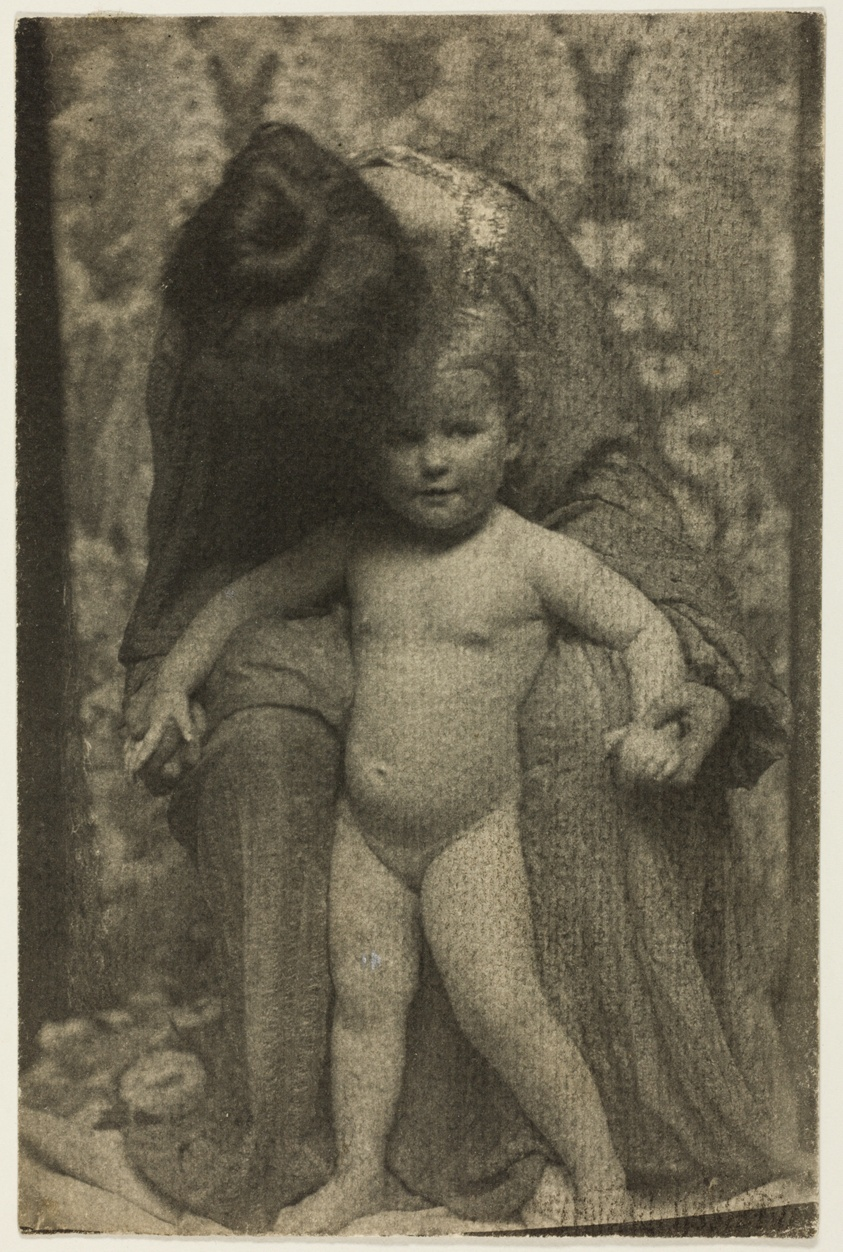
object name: Photograph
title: Mother and Child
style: Pictorialism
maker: Gertrude Käsebier (American, 1852–1934)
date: 1899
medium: Gum bichromate print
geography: United States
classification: gum bichromate print; pigment process; photographic process; photography; photograph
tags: mothers, children